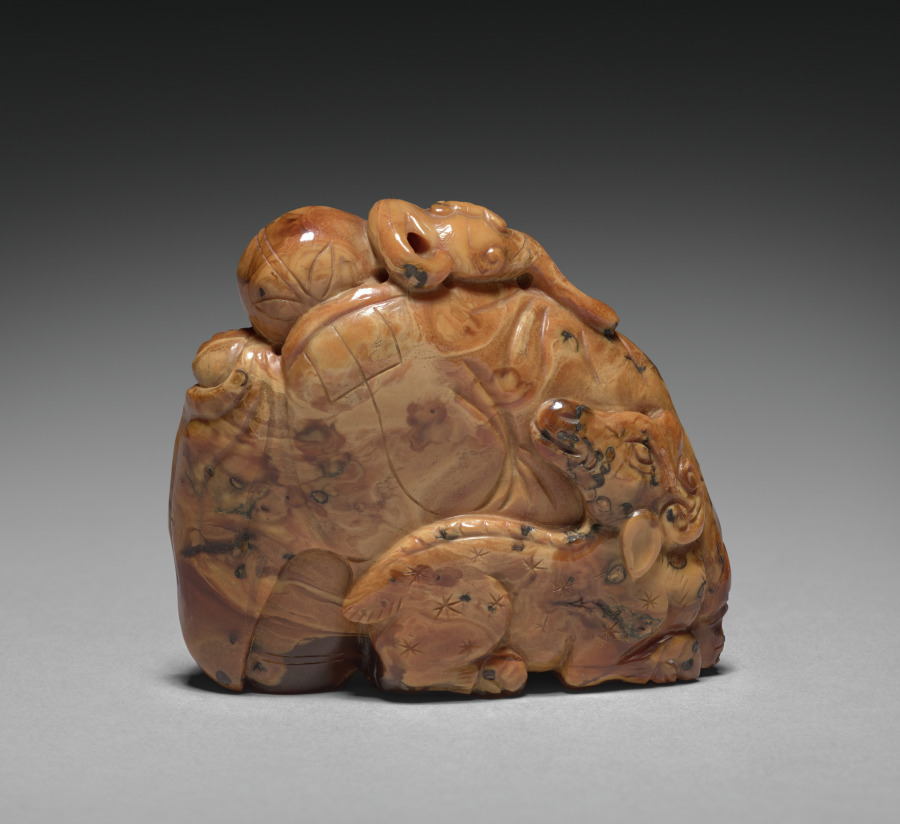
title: Li Taibo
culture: China, Qing dynasty (1644-1911)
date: 1700s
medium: amber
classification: Stone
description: This piece of ochre amber is carved in the round in the form of Li Bai 李白 (701–762), also known as Li Taibai or Li Taibo, 李太白. He was a poet in the golden age of Chinese poetry. Around a thousand poems are attributed to him. Li’s eyes are closed, an arm wrapped around his wine jar, in a drunken sleep. Perched on his shoulder is a bat, considered a lucky symbol as the Chinese word for bat, 蝠 fú, is pronounced the same as “good fortune” 福. Deer, like the one nestled behind Li, traditionally symbolize longevity and prosperity. These auspicious symbols create a bittersweet contrast with the legendary story that Li drowned while drunk when reaching to grasp the moon's reflection in the river.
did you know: Li Bai was one of the Eight Immortals of the Wine Cup, Tang dynasty scholars who enjoyed drinking alcohol.